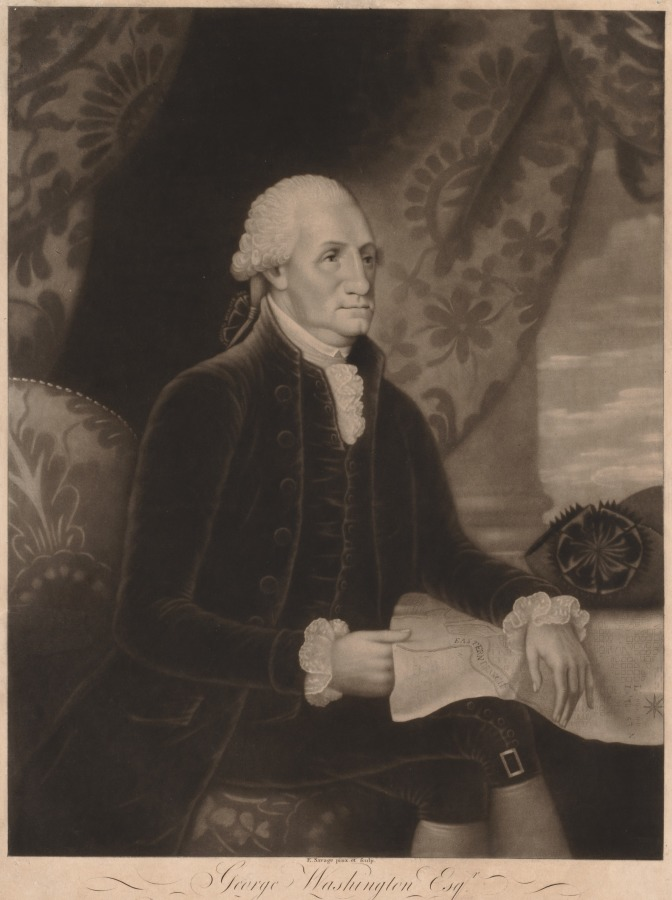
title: George Washington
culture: America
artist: Edward Savage (American, 1761–1817)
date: 1793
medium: mezzotint with line engraving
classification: Print